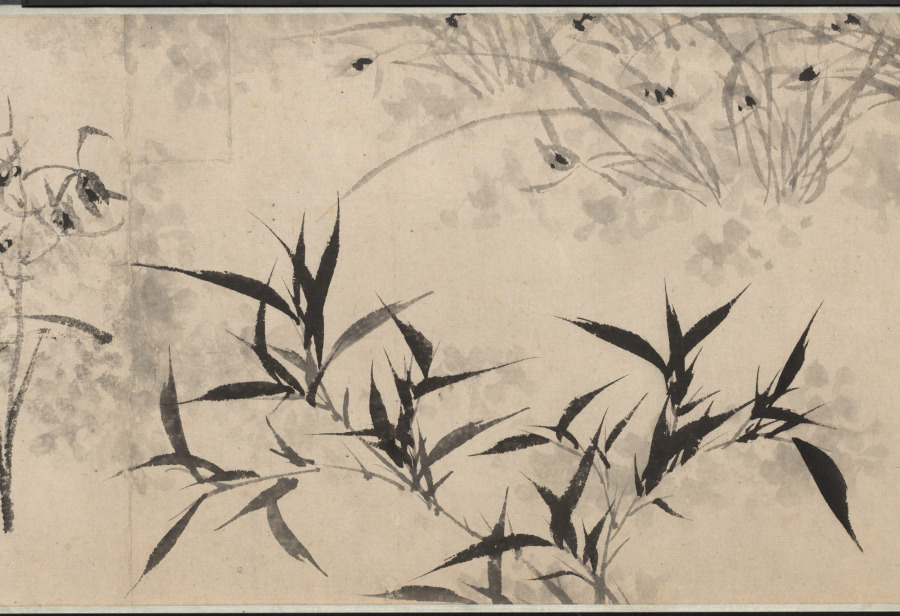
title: Rocks, Orchid, and Bamboo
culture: China, Qing dynasty (1644-1911)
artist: Shitao (Chinese, 1642–1707)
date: 1662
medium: handscroll; ink on paper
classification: Painting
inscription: Title colophon in four characters with signature and two seals on gold-flecked paper.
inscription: Artist's signature, inscription (with date of 1662), five seals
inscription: Colophon with two seals.